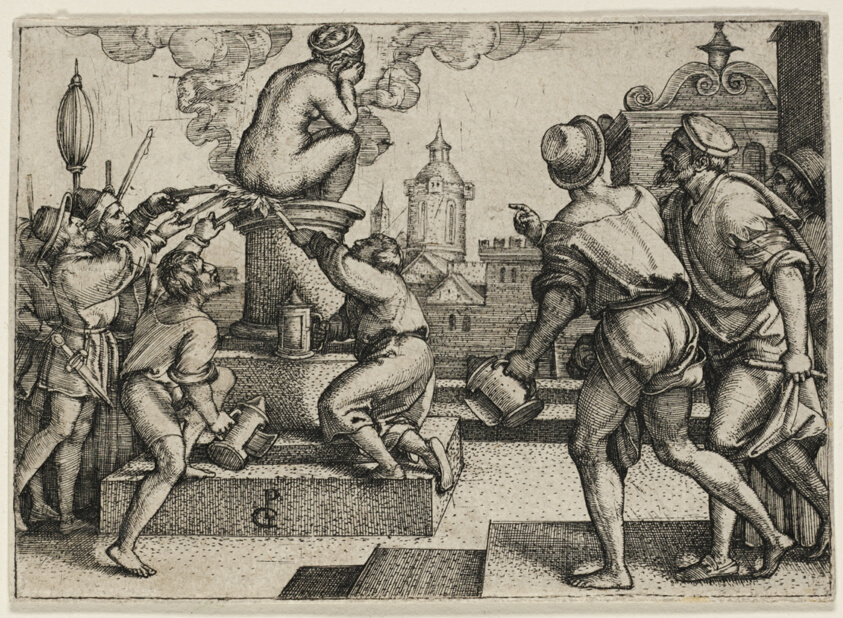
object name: Print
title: The Courtesan Punished, from The Story of the Magician Virgil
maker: Georg Pencz (German, c. 1500-1550)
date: 1541/42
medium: Engraving in black on ivory laid paper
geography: Germany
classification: engraving; print; prints and drawing